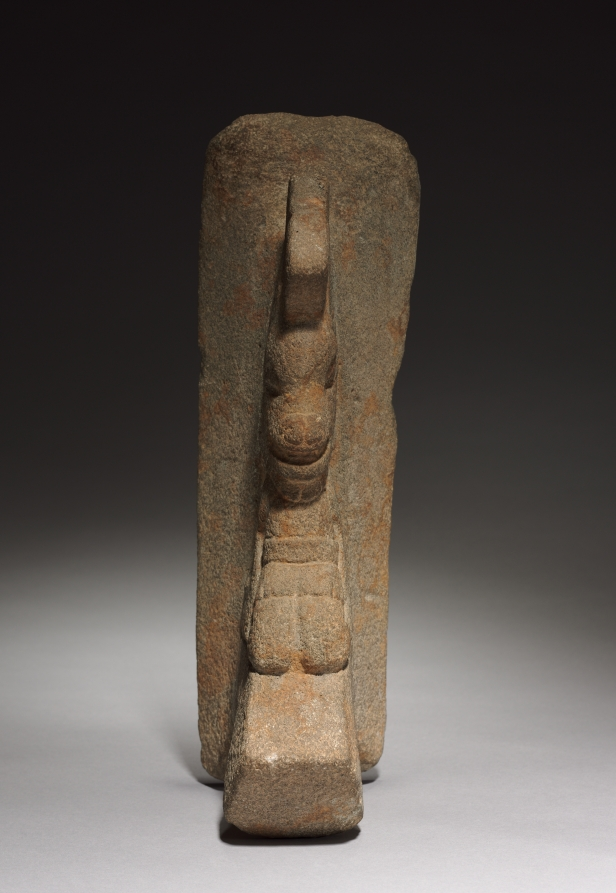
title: Animal Palma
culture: Mexico, Veracruz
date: 600–1000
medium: gray volcanic stone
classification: Sculpture